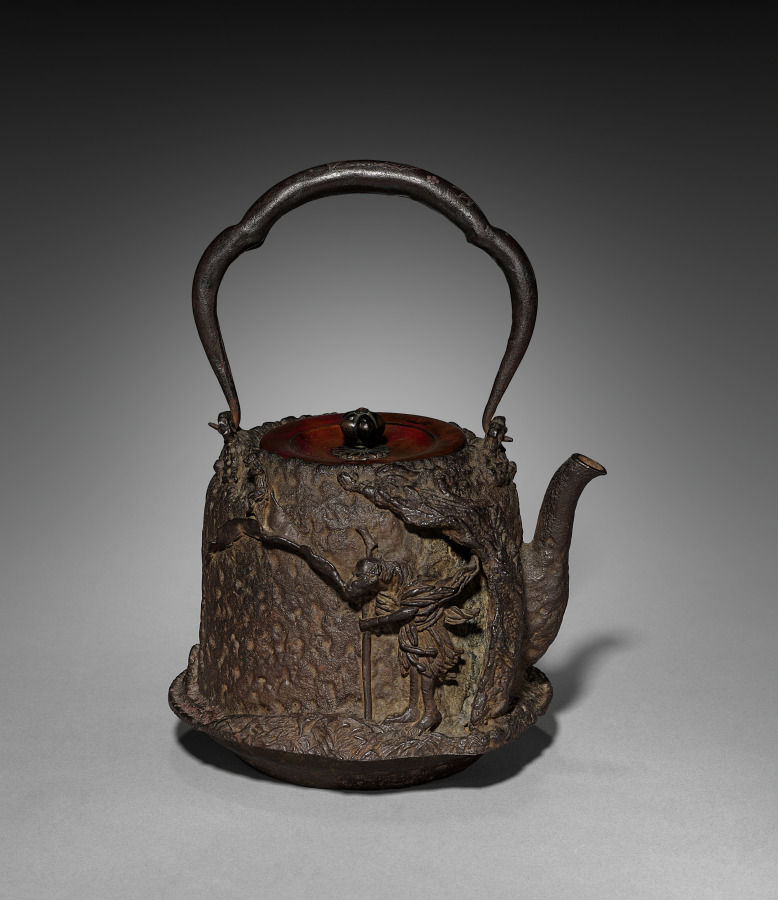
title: Covered Tea Kettle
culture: Japan, Edo period (1615–1868)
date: 1615–1868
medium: iron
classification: Metalwork